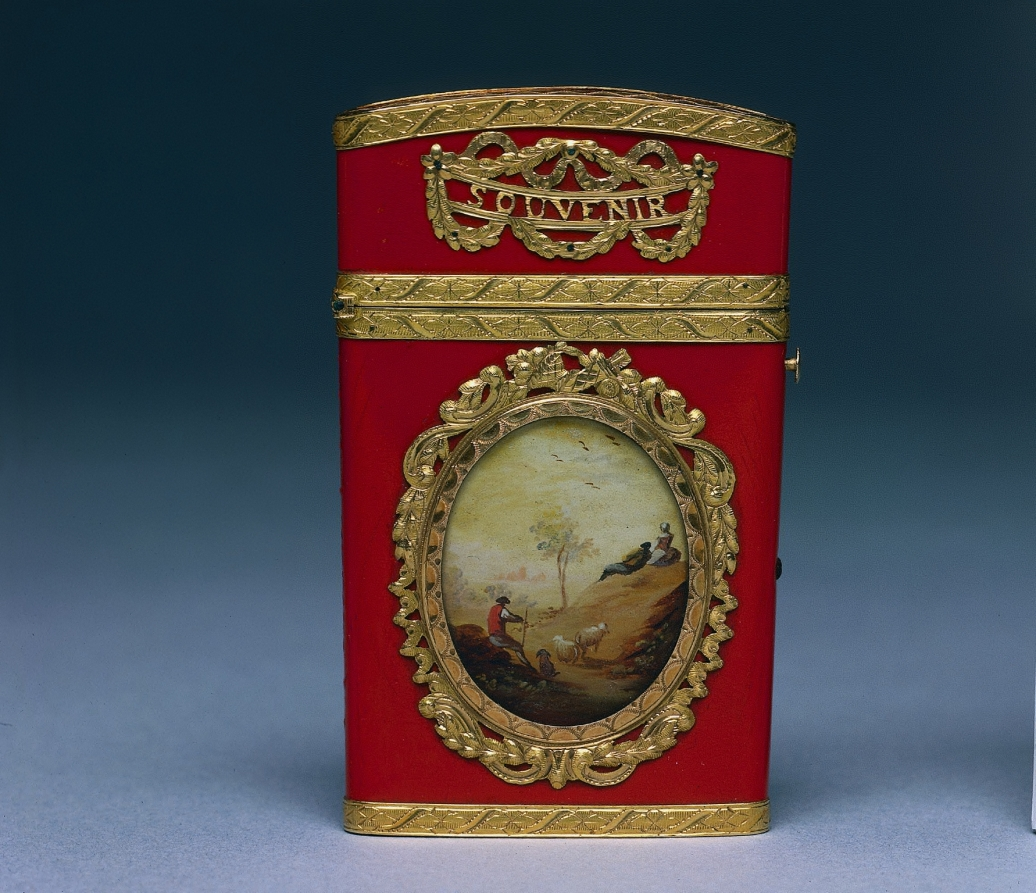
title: Carnet de Bal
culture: France, 18th Century (style of Louis XVI)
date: 1774–1775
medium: enamel on steel (?), gold mounts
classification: Miscellaneous